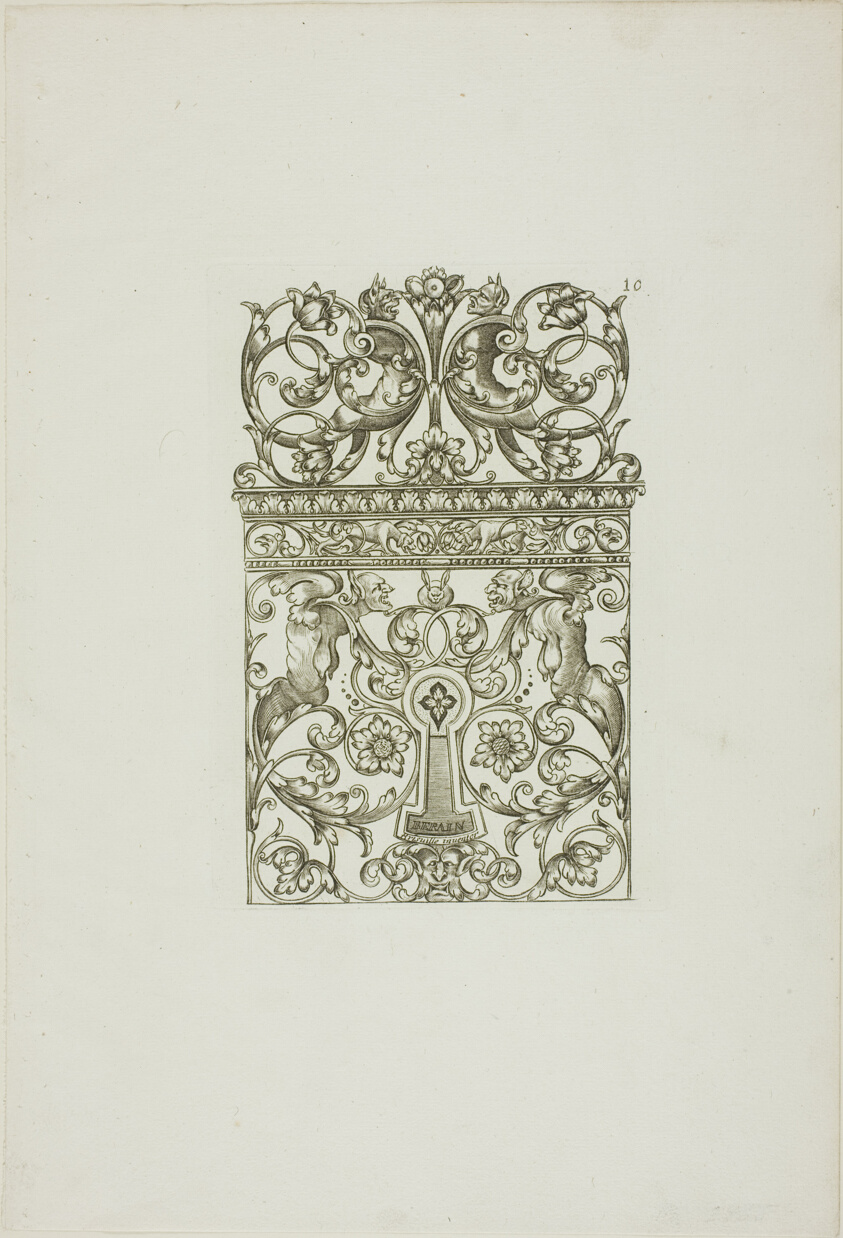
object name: Print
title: Designs for Locksmiths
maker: Jean Bérain I (French, 1640-1711); after Hugues Bris e Ville (French)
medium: Etching on paper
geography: France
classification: etching; print; prints and drawing